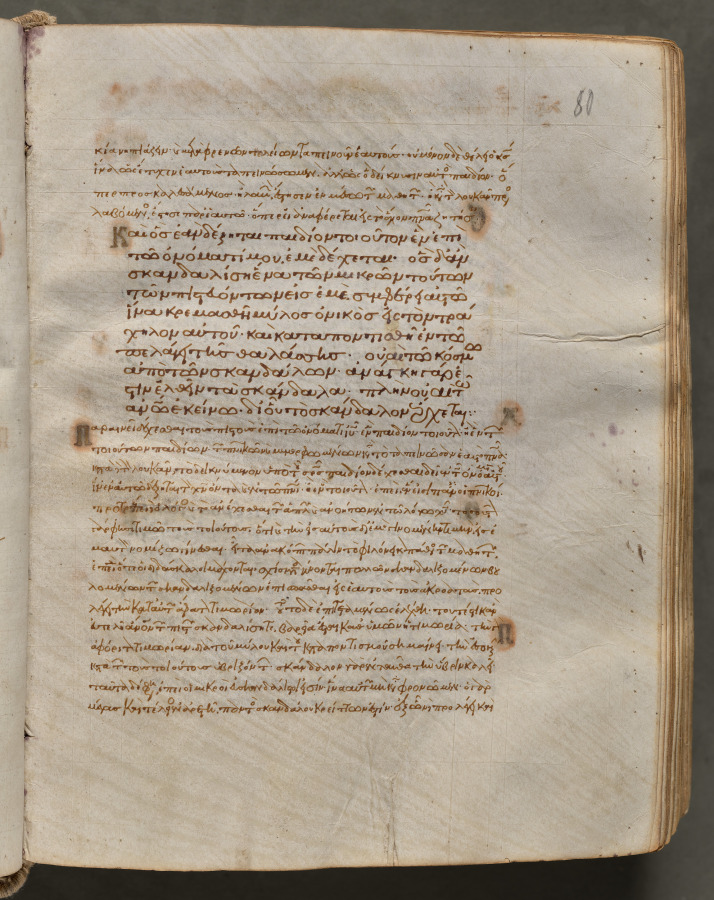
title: Text, folio 80 (recto), from a Gospel Book with Commentaries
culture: Byzantium, Constantinople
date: c. 1000–1100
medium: ink, tempera, and gold on vellum; leather binding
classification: Bound Volume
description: Each of the four gospels in this book opens on a page with brilliantly illuminated borders depicting the author of the text as well as birds-principally peacocks, symbols of the immortality of the soul-and fountains, representing the fountain of life and the salvation of the soul. This volume consists of 428 leaves with texts in Greek. Its level of sophistication suggests that it was probably written and decorated in a monastery in Constantinople.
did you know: Gospel Books were carried in procession through Byzantine churches.